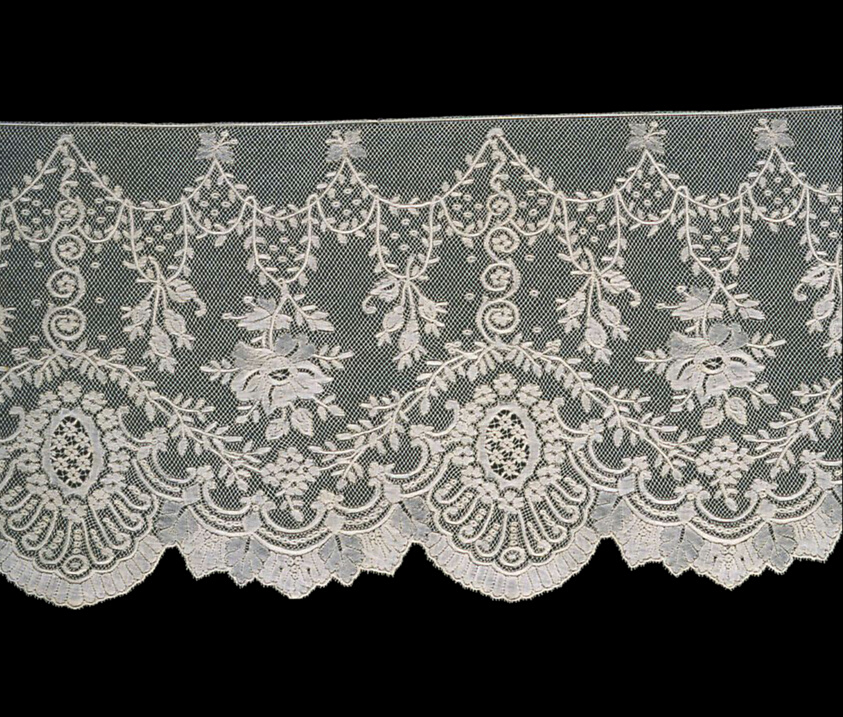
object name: Textile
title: Flounce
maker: Belgium, probably Ghent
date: 1875/1900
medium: Cotton, bobbin straight lace of a type known as "Valenciennes" with a square Valenciennes mesh ground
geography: Belgium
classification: textile; lace - bobbin; lace